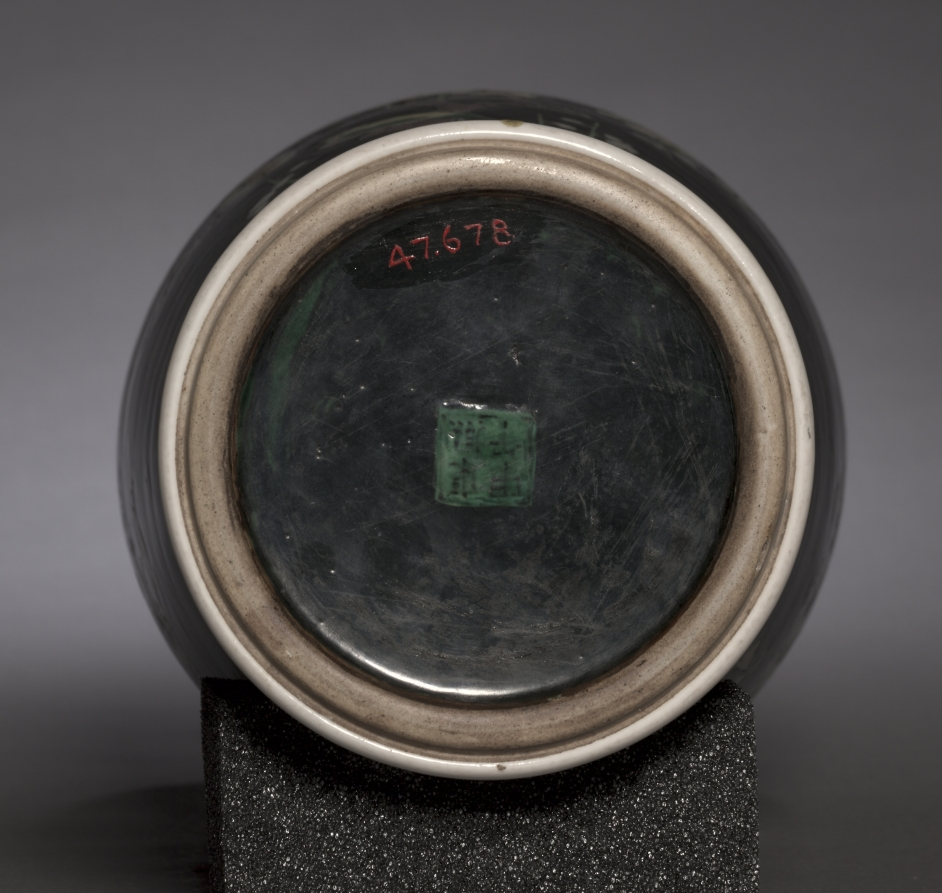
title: Baluster Vase with Blossoming Cherry Tree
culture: China, Qing dynasty (1644-1911), Kangxi reign (1662-1722)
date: 1714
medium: porcelain with polychrome enamel decoration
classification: Ceramic